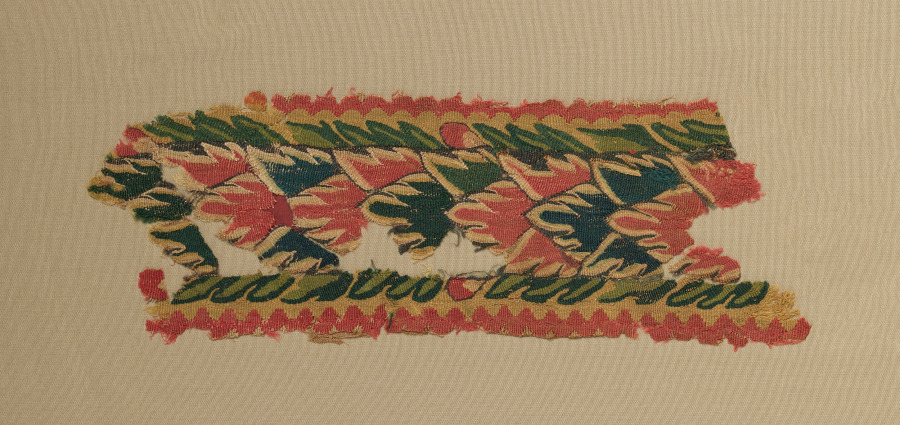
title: Panel from a Large Curtain, Overlapping Leaves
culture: Egypt, Byzantine period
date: 300s–400s CE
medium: tapestry weave sewn on plain weave ground; undyed linen and dyed wool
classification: Textile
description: These colorful overlapping leaves with interspersed buds along the sides originally formed a decorative panel in a large curtain. Together with several similar designs, they alternated with areas of undyed linen decorated with scattered wool and linen tapestry-woven motifs. Although decorative motifs were often woven into the ground fabric, this panel was sewn on afterwards. During the late Roman and early Christian period curtains with woven or applied decoration were used in churches and Christian meeting rooms to separate the clergy from the congregation. They were also hung in doorways and between columns both inside and outside. Their importance is evident in numerous portraits of religious figures and laymen represented between curtained arches.